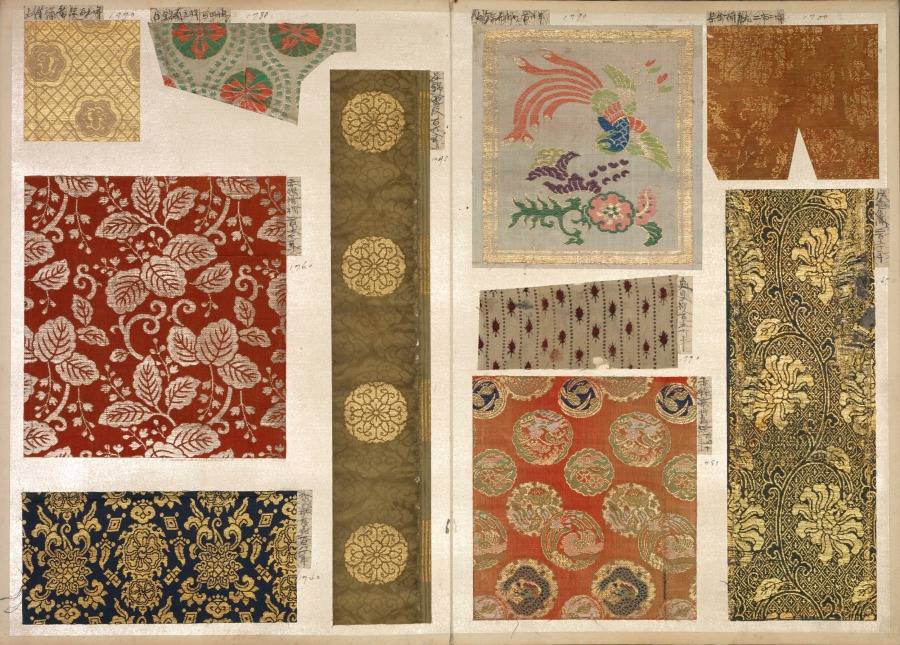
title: Album of Textile Samples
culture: Japan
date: 1790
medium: silk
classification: Textile